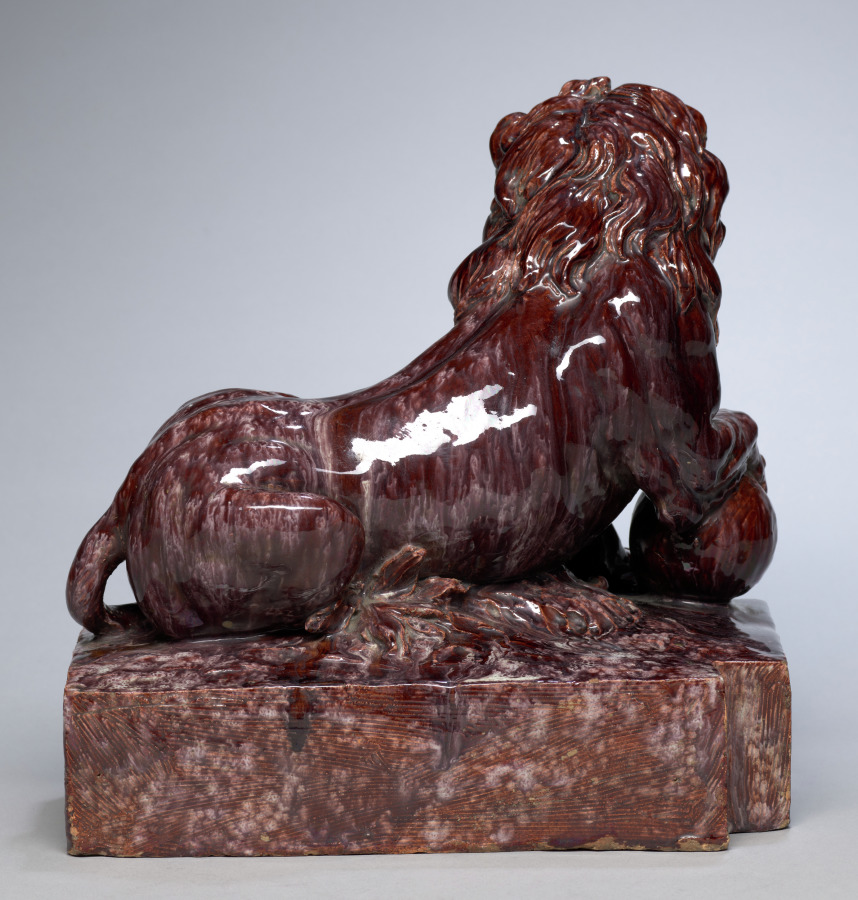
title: Lion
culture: France, 20th century (?)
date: 1900s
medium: terracotta glazed in mottled purple tin glaze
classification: Ceramic